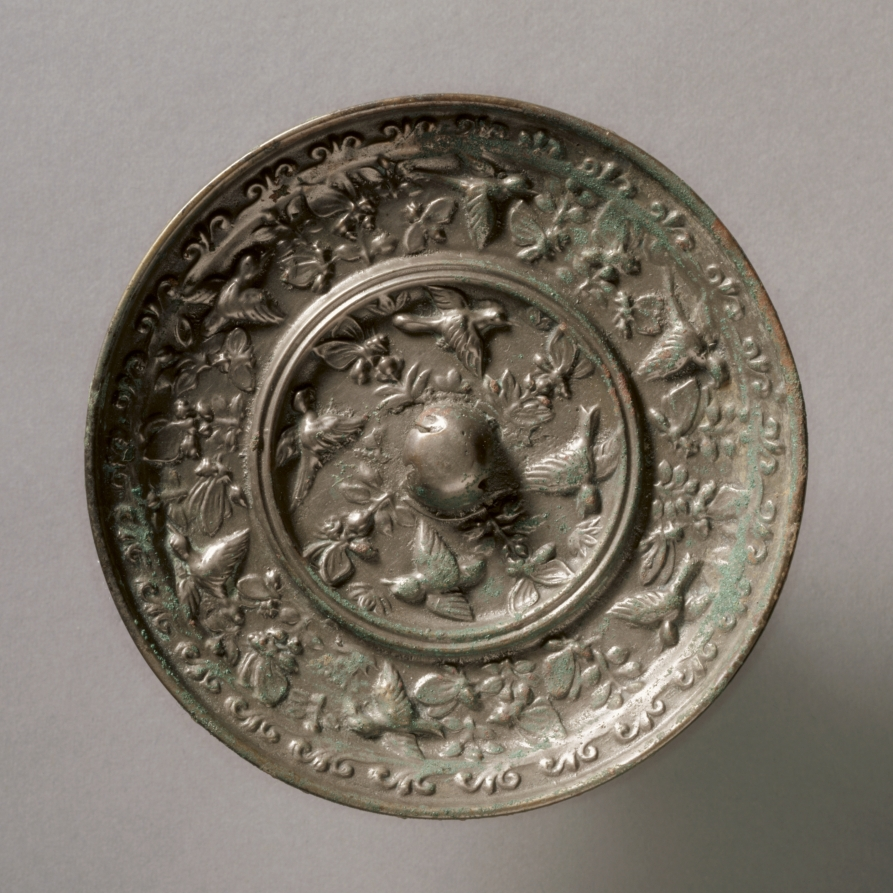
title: Mirror with Sparrows and Floral Sprays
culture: China, Tang dynasty (618-907)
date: late 600s-early 700s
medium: bronze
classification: Metalwork